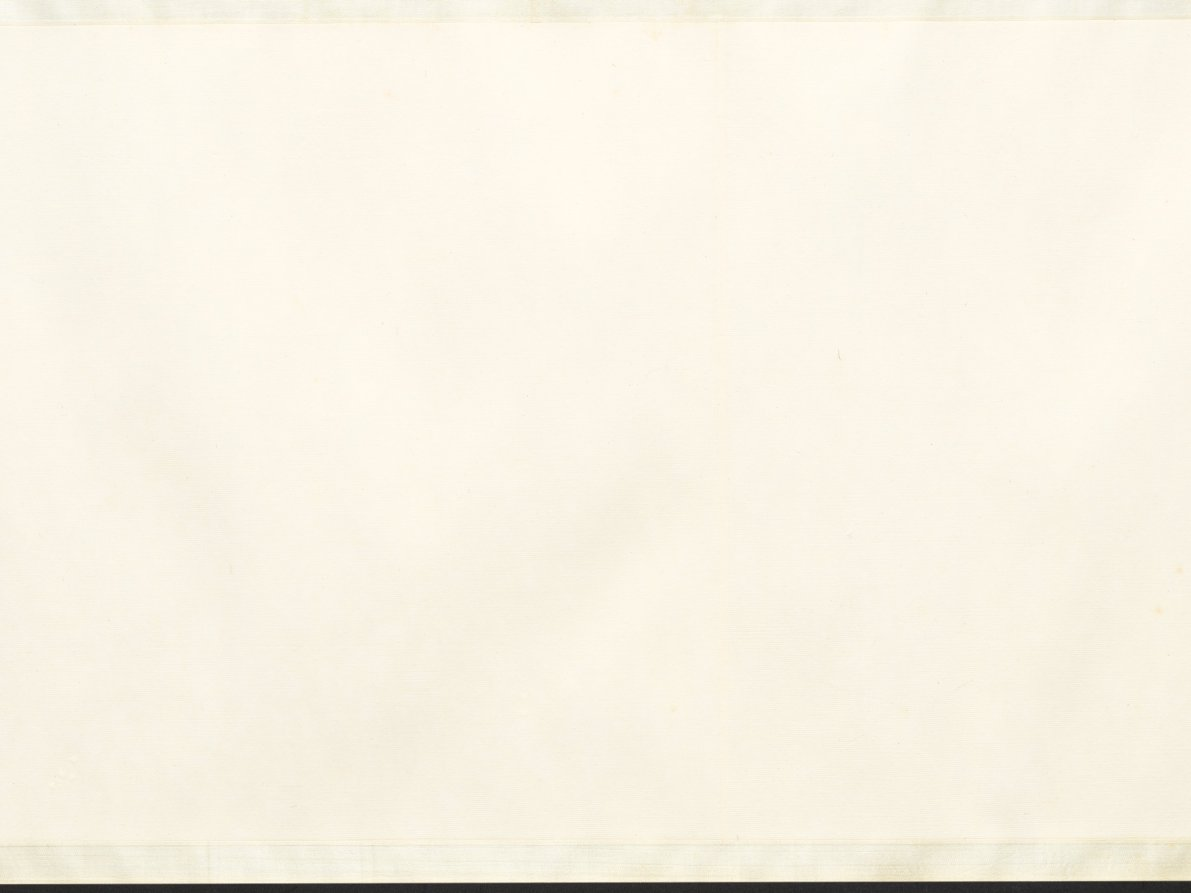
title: Fisherman's Joy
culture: China, Ming dynasty (1368–1644)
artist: Qian Gu (Chinese, 1508–c. 1578)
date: 1572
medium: Handscroll; ink and light color on paper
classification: Painting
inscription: Artist's inscription, signature, and seal: On the autumn day of the jen-shen year [1572], P'eng-ch'eng, Ch'ien Ku painted [this]. [seal] Hsüan-ch'ing shih. 2 colophons, both dated 1689, and 5 additional seals of Yün Shou-p'ing (1633-1690).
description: This painting has a scene showing two small crafts, each manned by two fishermen, practicing a traditional fishing method. In one of them, a man uses a bamboo pole to direct the movements of a cormorant bird sent into the water. Cormorant fishing, witnessed in some areas of the lower Yangzi River, appears in Zhe school paintings. Qian Gu may have borrowed these narrative figure scenes from Zhe school paintings, while his vantage point, brushwork, and soft tones align with the Wu school style. Scenes of fishermen appealed to urban and educated audiences who idealized the self-sufficient independence of fisherfolk.